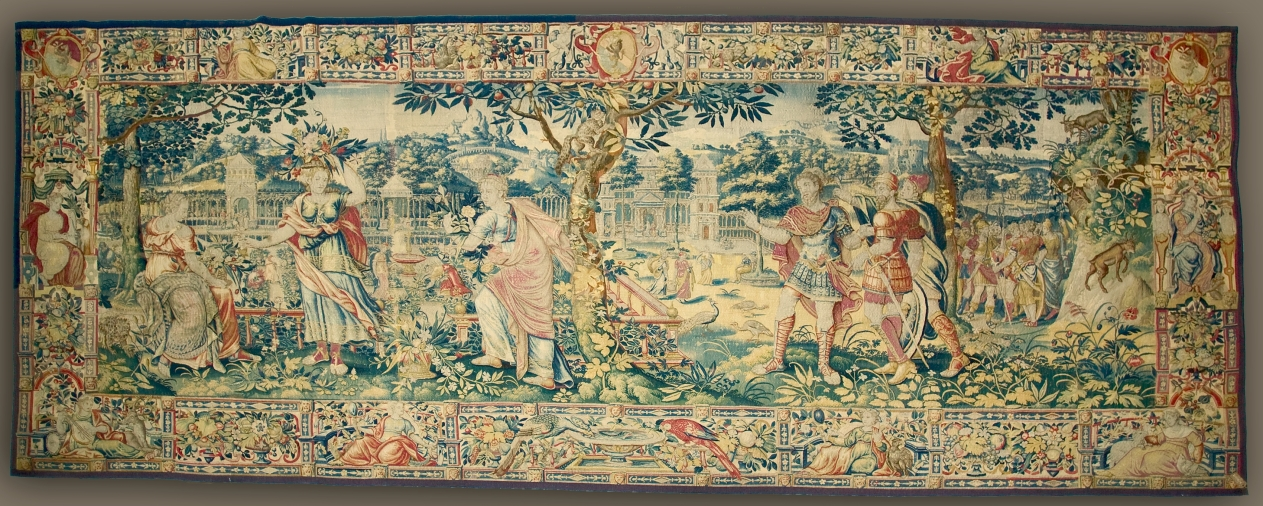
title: Romans Admiring the Sabine Women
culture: Belgium, Brussels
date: 1570–90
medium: silk and wool: tapestry weave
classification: Tapestry